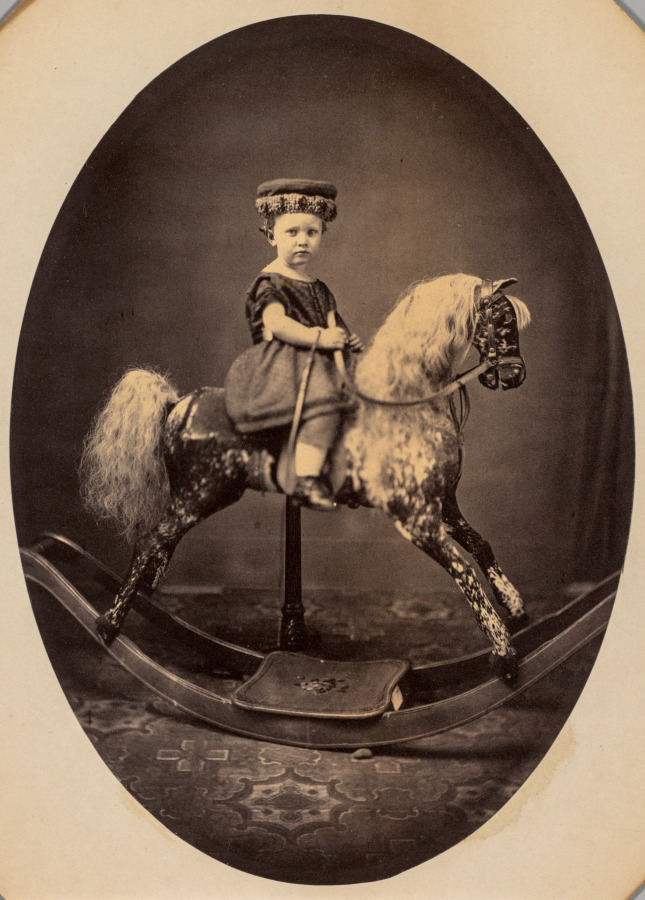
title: Francis Wayland Sherman at the Age of 2 Years 10 Months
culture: America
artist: H.N. Roberts (American, active 1860s)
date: 1862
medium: albumen print from wet collodion negative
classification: Photograph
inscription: written in brown ink on verso: "Francis Wayland Sherman/ Taken at the age of 2 yrs + 10 mos."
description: An inscription on the back of this photograph records the sitter’s identity and age. Because he belonged to a prominent family, it was possible to learn through research that he grew up in Ludlow, Vermont, the son of a successful businessman with pharmaceutical and music enterprises that he later managed. The rocking horse, a favorite toy of Victorian nurseries, may have belonged to the wealthy child or have been a prop in the photographer’s studio. This is an especially luxurious example. Dappled gray rocking horses were the most popular in that era, having been favored by Queen Victoria for her children’s nursery.